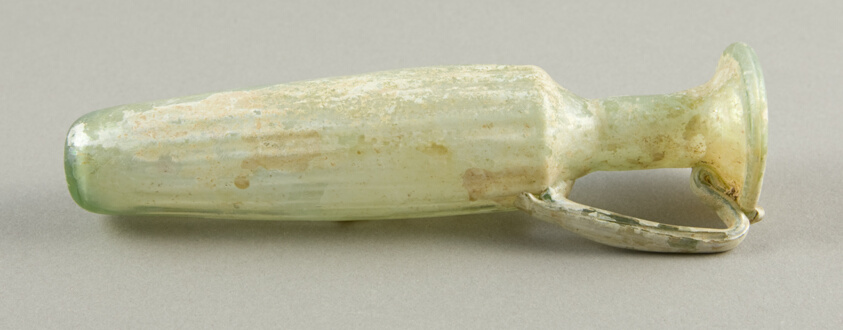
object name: Vessel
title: Jug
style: syrian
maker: Roman; coast of Syria or Palestine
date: 3rd-4th century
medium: Glass, blown technique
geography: Syria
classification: glass; vessel; ancient art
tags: vessels, containers